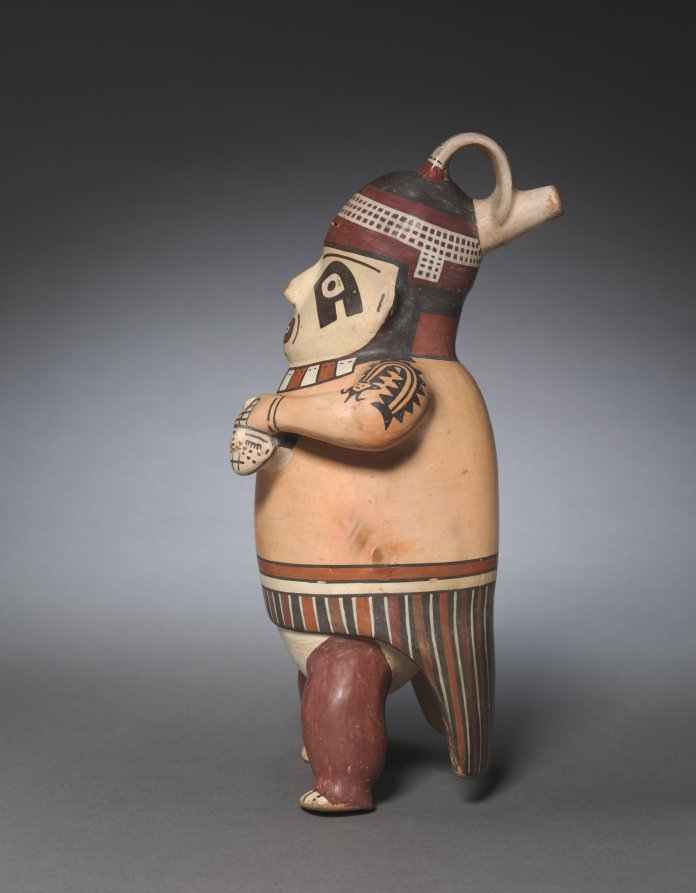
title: Male Effigy Vessel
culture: Peru, South Coast, Nasca, Early Intermediate Period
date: 100–650 CE (thermoluminescence date, 410–1010 CE)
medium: ceramic and slip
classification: Ceramic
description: The style is typically Nasca: modeling is minimal and the surface is decorated with the vibrant, earth-colored slips that are a hallmark of Nasca ceramic art. Male figures are a well-known category of Nasca ceramic production, although the shape of this one, which stands upright on two legs and is additionally supported from behind by a long loincloth, is unusual.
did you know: This figure holds a human head, which the Nasca viewed as a source of great power.